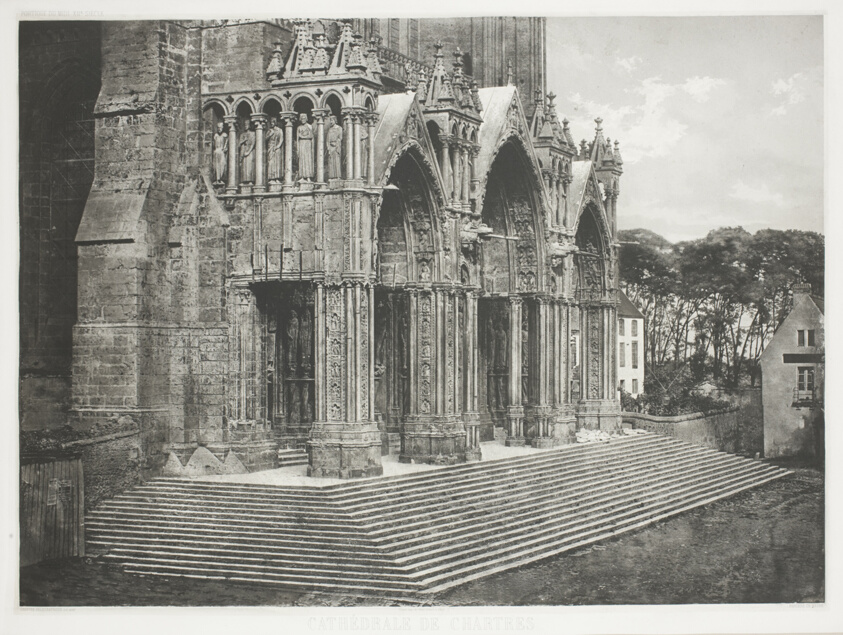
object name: Photograph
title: Cathedrale de Chartres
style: 19th century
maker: Charles Nègre (French, 1820–1880)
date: 1856 or 1857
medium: Photogravure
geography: France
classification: photography; photogravure; photomechanical process; photograph